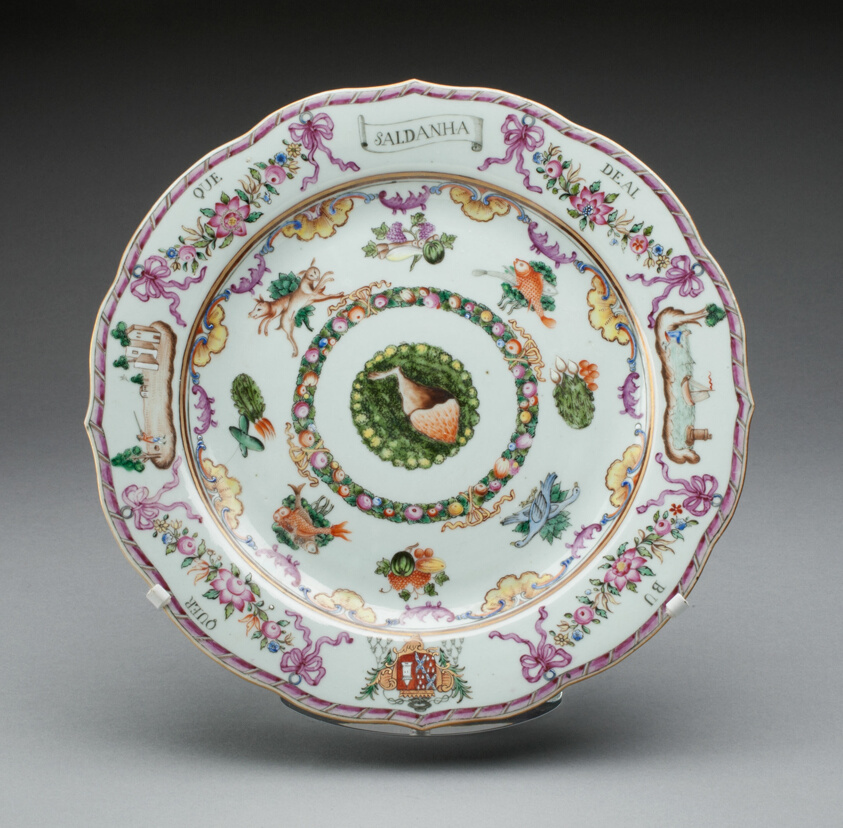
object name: Ceramics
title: Plate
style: chinese export, Chinese (culture or style), East Asian, asian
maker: China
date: 1760/70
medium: Hard-paste porcelain with polychrome enamels and gilding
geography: China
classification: plate (general, dish); dish (vessel); chinese export porcelain; porcelain; european decorative arts; ceramics